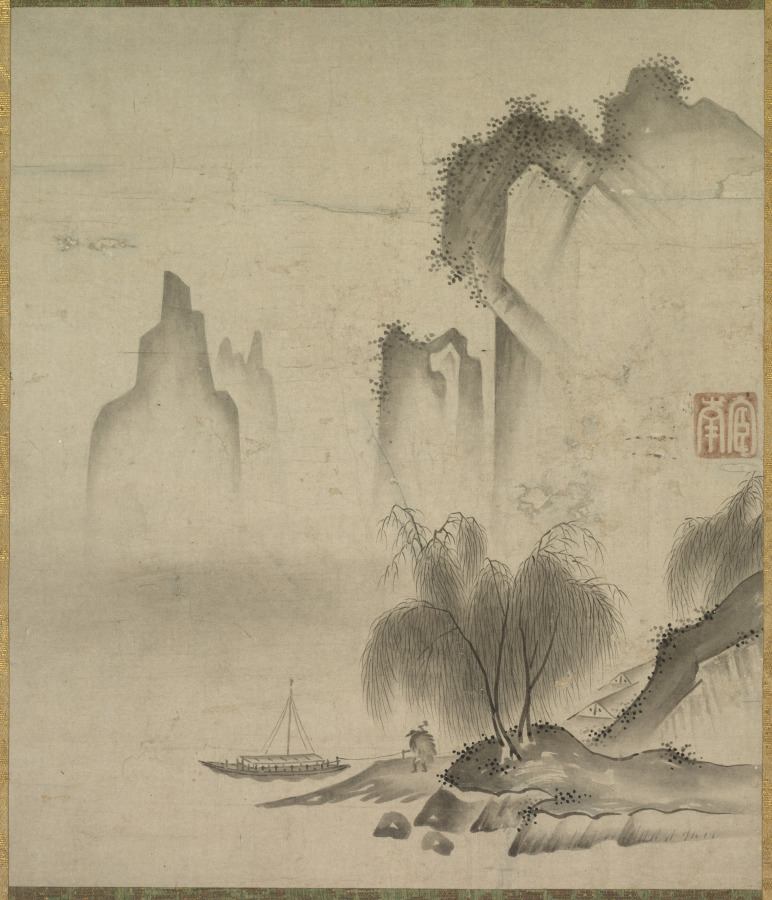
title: Figure Mooring a Boat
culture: Japan, Muromachi period (1392–1573)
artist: Kannan (Japanese, active mid-1500s)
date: mid-1500s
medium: hanging scroll, ink on paper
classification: Painting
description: Kannan is a little-known painter of the Kanto region. Close inspection of this quiet scene suggests that it represents the “night rain over Xiao and Xiang” scene from the Eight Views of the Xiao and Xiang Rivers. The style of the painting is similar to some works from Korea; as Japanese and Korean monk-painters traveled back and forth between one another’s monastic communities during the 1400s and 1500s, Kannan surely had the opportunity to consider incorporating Korean stylistic features into his work.